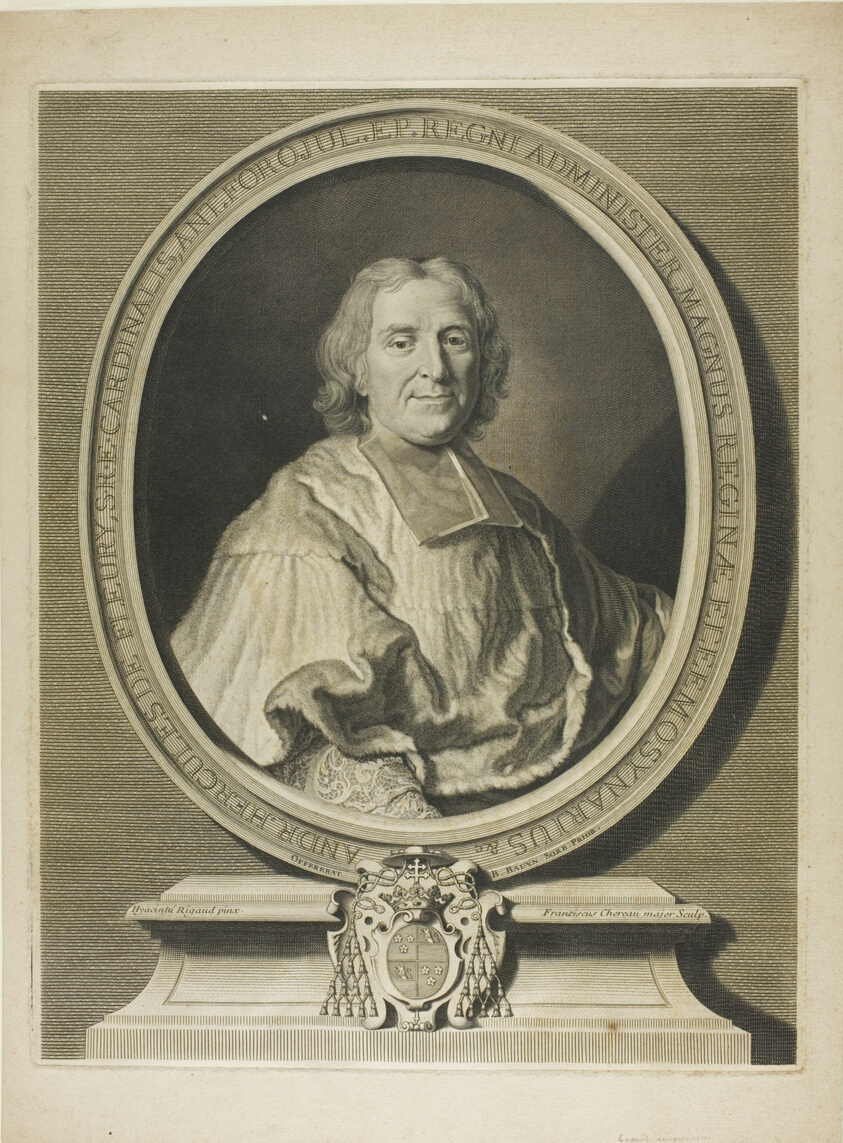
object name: Print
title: Portrait of Cardinal Fleury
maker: François Chereau, the elder (French, 1680-1729); after Hyacinthe Rigaud (French, 1659-1743)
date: 1726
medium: Engraving on paper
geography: France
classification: engraving; print; prints and drawing